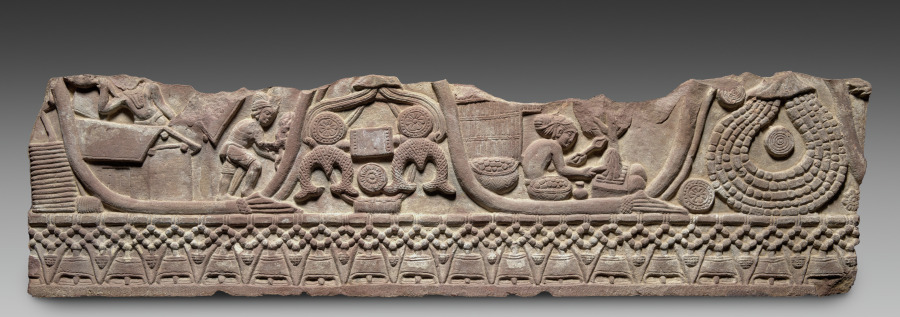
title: Section of a Coping Rail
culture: India, Madhya Pradesh, Bharhut, Shunga period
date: c. 150 BCE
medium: sandstone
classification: Sculpture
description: A coping rail is the top portion of a fence that connects the upright posts. Here, an undulating lotus rhizome blossoms with jewelry, and in the spaces between are scenes from two of the Buddha's past lives. At the left, a man catches and kills a lizard to eat it, and then lies about its running off (Godha Jataka); at the right an ascetic performs a Vedic fire sacrifice (possibly the Rajovada Jataka).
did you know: Known for having excellent vertical climbing abilities, the Indian monitor lizard (godha) is prized for its skin and meat.